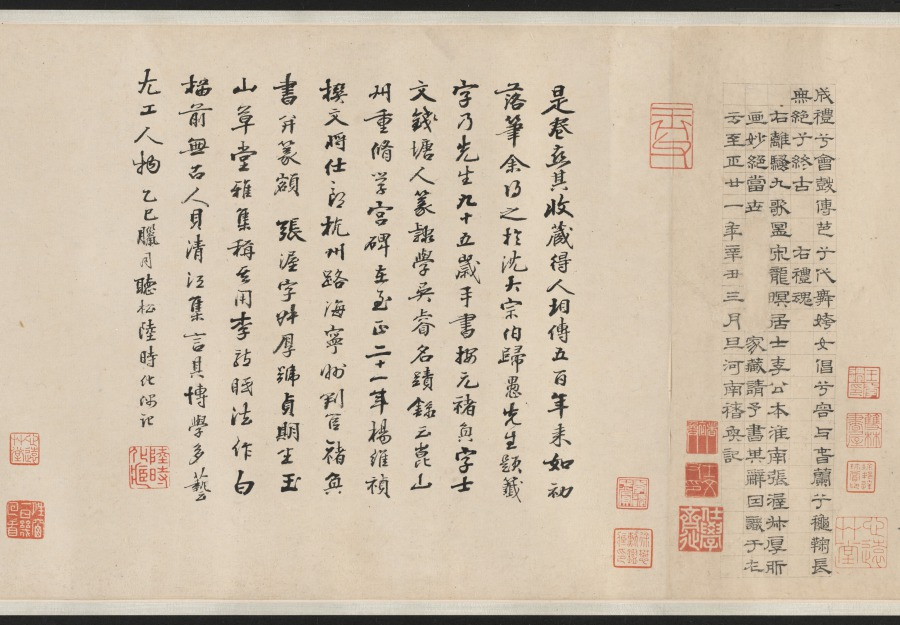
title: Nine Songs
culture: China, Yuan dynasty (1271-1368)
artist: Zhang Wo (Chinese, active c.1336–after 1364)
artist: Chu Huan (Chinese, active 1361)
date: 1361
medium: handscroll; ink on paper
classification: Painting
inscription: 7 colophons and 47 seals: 1 colophon, dated 1361, and 28 seals of Chu Huan 褚奐 (active c. 1361); 1 colophon, dated 1785, and 1 seal of Lu Shihua 陸時化 (1714-1779); 2 seals of Lu Yü-ch'ing (18th c.); 1 colophon, dated 1935, of Ye Gongchuo 葉恭綽 (1881-1968); 1 colophon, dated 1935, of Wu Hufan 吳湖帆(1894–1968); 1 colophon, dated 1938, and 1 seal of Wang Tongyu 王同愈 (1856-1941); 1 colophon, dated 1941, of Wu Huayuan 吳華源 (1893-1972); 1 colophon, dated 1942, and 9 seals of Xu Bangda 徐邦達 (1911–2012); 1 colophon, dated 1942, of Lang Jingshan 郎靜山 (1892-1995); 1 colophon, dated 1944, of Tang Yun 唐雲 (1910-1993); 6 seals of Wang Jiqian [C.C. Wang] 王季遷 (1907–2003).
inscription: Text of The Nine Songs written by Chu Huan at the end of each section.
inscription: 右離騷九歌圖，宋龍溟居士李公本，淮南張渥叔厚所畫妙絕當世。家藏請予書其辭目識于左。至正二十一年辛醜三月旦河南褚奐記。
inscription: Colophon by Lu Shihua 陸時化 (1714–1789): This scroll is fortunate to have been handed down from collections of the right people. Now, after 500 years, its condition is as good as when it was painted. I acquired this from Mr. Shen Guiyu [1673-1769], the President of the Board of Rites. The label is in his handwriting when he was 95 years old. I submit that Chu Huan (t. Shiwen) of the Yuan Dynasty was a native of Qiantang. His "seal" and li writings are in the style of Wu Rui. For example, in [Chu Kuei's] Ming ji lu [A list of masterpieces] is recorded the stele commemorating the restoration of the prefectural school of Kun-shan, the text of which was composed by Yang Weizhen in the twenty-first year of Zhizheng [1361]; and the calligraphy as well as the title in li style was by Chu Huan, who was at that time an assistant judge of the prefecture of Haining in the circuit of Hangzhou. Zhang Wo's zi is Shuhou (叔厚). His literary name is Zhen Qisheng (贞期生). According to [Gu Ying's] Yu shan cao tang ya jii, he liked to paint in the bai-miao or the "pure delineation" style after the method of Li Longmian [Li Gonglin 李公麟], which finds no peer among the ancient masters. This is agreed upon [by Pei Ch'iung] in his Qing jiang zhi who praised [Zhang Wo] as being quite learned and well-versed in many branches of the arts, especially figure painting. Recorded by Lu Shihua [The mountain dweller], listening to the pine, in the twelfth month of the yisi year [1785].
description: Painted in the baimiao, or fine-line drawing style, this ancient work demonstrates the literati’s use of abstract calligraphic brushwork for self-expression. The subject of the “Nine Songs”—songs associated with shamanistic rituals in the ancient Chu kingdom—had traditionally provided artists with myths and legends that they could explore and reinterpret in their own works.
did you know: Divided into eleven sections, the scroll contains illustrations by painter Zhang Wu followed by a transcription of the relevant verse by calligrapher Chu Huan.